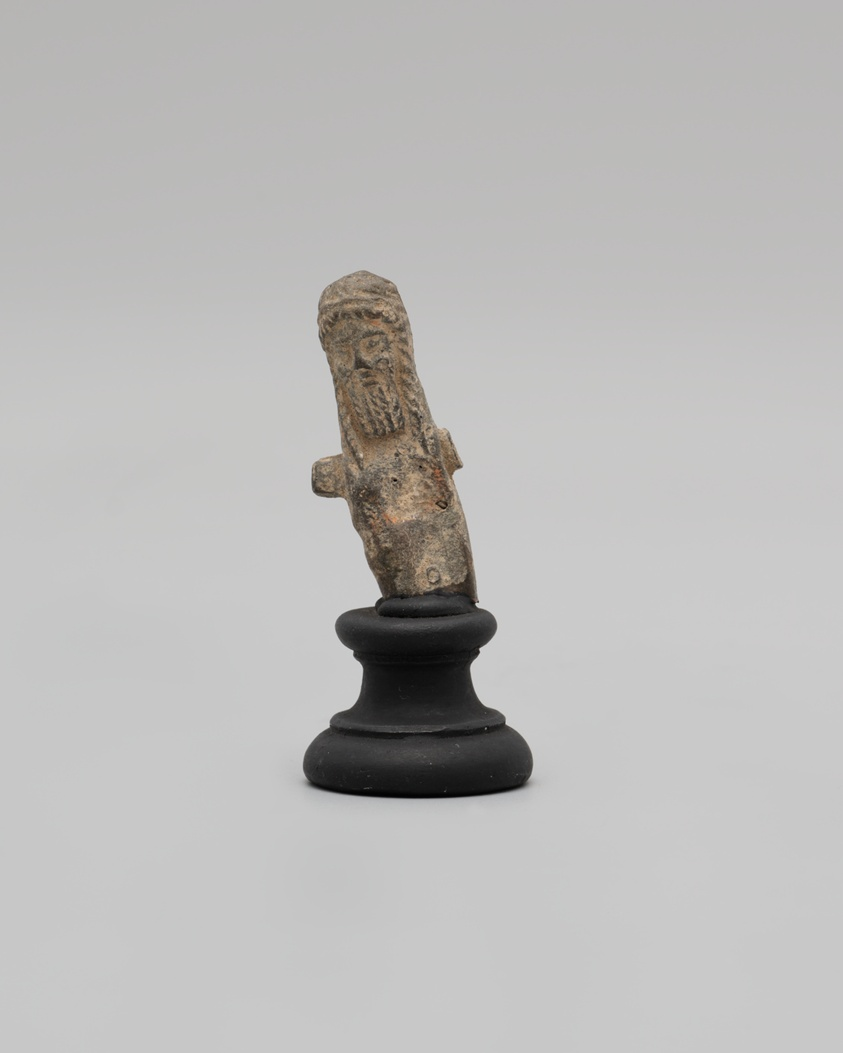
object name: Sculpture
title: Fragment of a Herm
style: greek, ancient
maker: Greek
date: 3rd-2nd century BCE ?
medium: terracotta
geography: Greece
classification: earthenware; ceramics; sculpture; ancient art